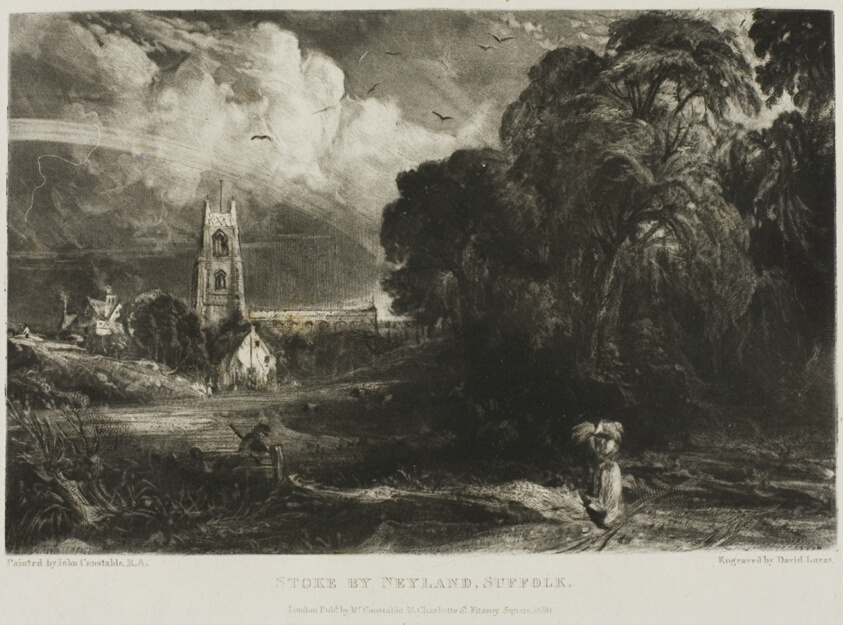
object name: Print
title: Stoke by Neyland, Suffolk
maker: David Lucas (English, 1802-1881); after John Constable (English, 1776-1837)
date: 1831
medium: Mezzotint on paper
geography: England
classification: mezzotint; print; prints and drawing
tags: landscapes